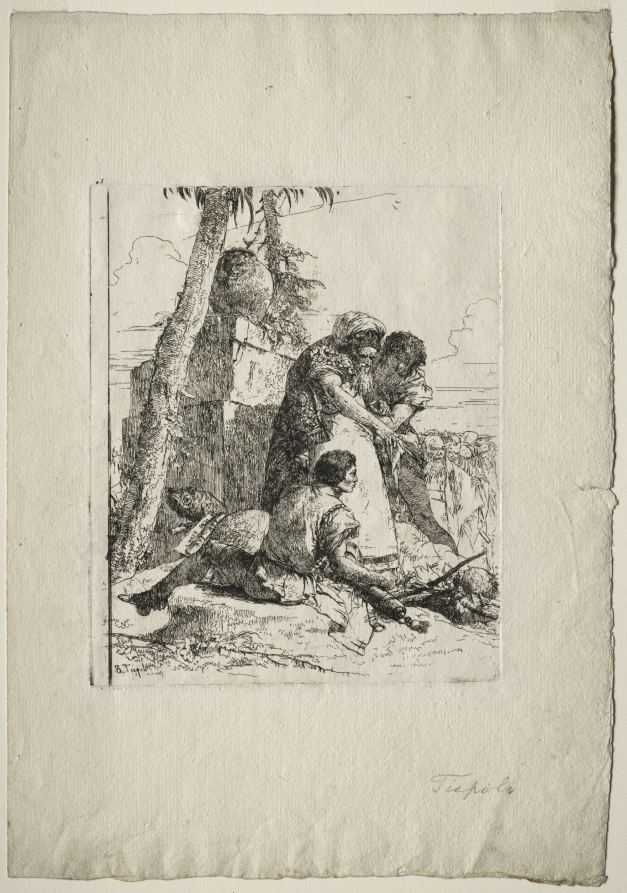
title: Scherzi di Fantasia: Magician Pointing Out a Burning Head to Two Youths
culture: Italy, 18th century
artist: Giovanni Battista Tiepolo (Italian, 1696–1770)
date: 1750–60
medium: etching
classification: Print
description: A scherzo is a musical composition made up of little phrases, with implications of playfulness. Tiepolo's Scherzi are improvised scenes of magicians, philosophers, soldiers, old men in turbans, and shepherds who consult horoscopes, skulls, skeletons, and snakes among altars, ruins, and ancient bas-reliefs. The transitory nature of life, the vanity of human pursuits, and direct confrontation with death, are the recurring themes. The eerie mood of the prints reflect the preoccupation of 18th-century Venice with magic, superstition, and witchcraft. Light was Tiepolo's essential means of expression and the basic element of his style. The sensation of sunlight bathing each scene is an illusion created by the contrast of the nervous, broken lines against white paper. Shade is obliterated; even the darkest areas are transparent as they, too, are created out of light.